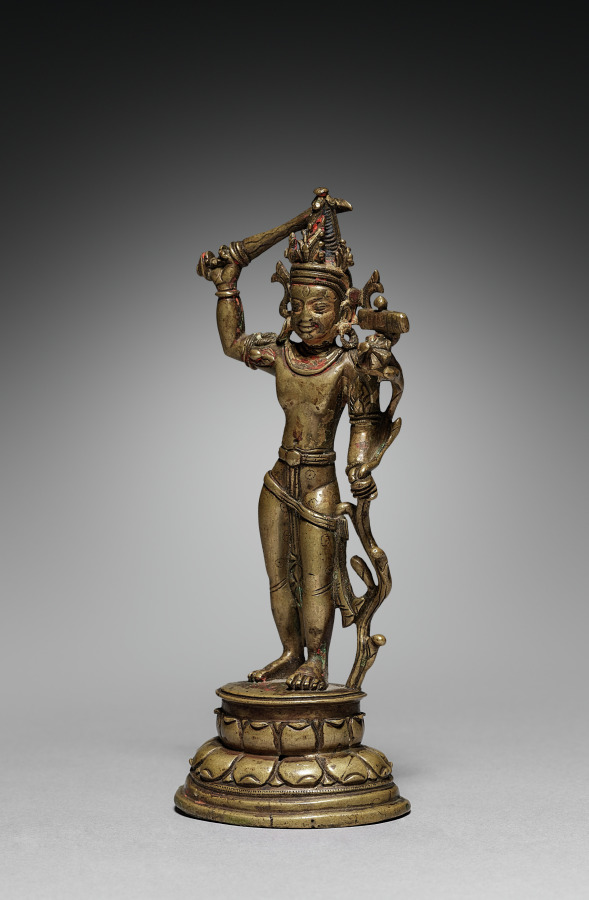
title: Standing Manjusri (Arapacana Form)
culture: India, Pala, 12th-13th century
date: 1100s-1200s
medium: bronze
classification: Sculpture